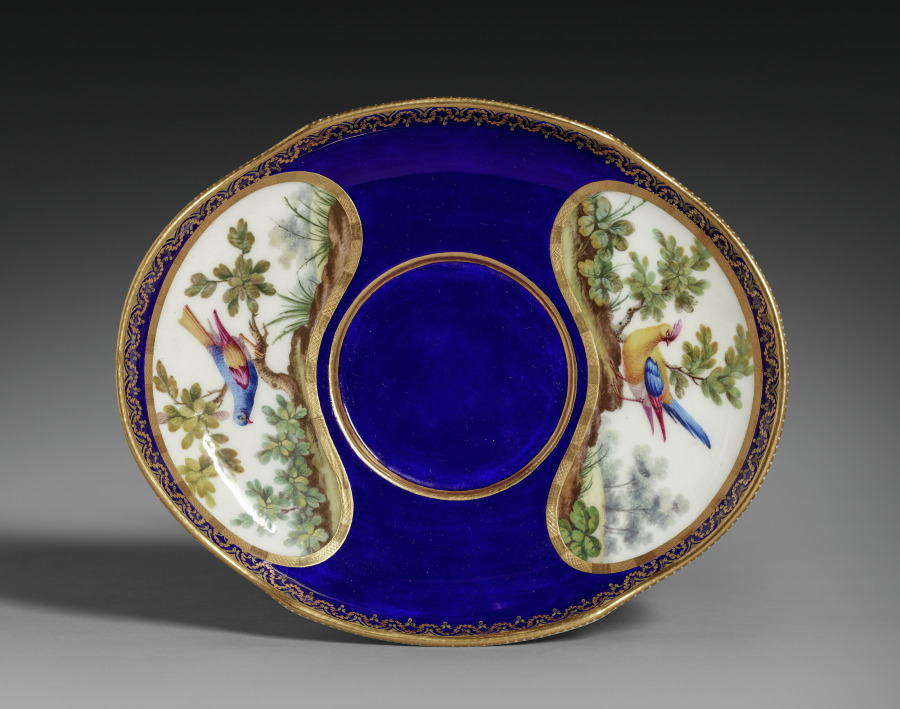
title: Stand for a Broth Bowl (Plateau Ovale)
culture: France, Sèvres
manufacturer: Sèvres Porcelain Factory (French, est. 1756)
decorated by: François-Joseph Aloncle (French)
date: 1772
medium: soft-paste porcelain with enamel an gilt decoration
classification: Ceramic